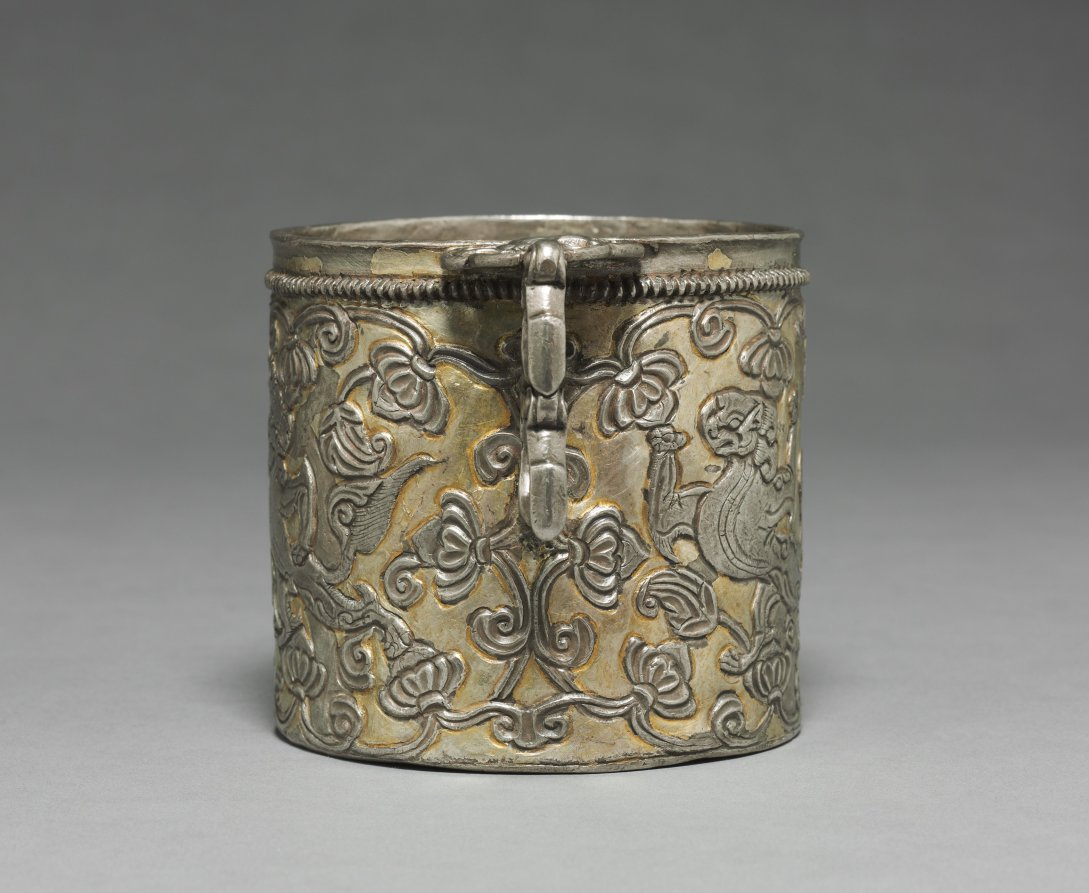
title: Beaker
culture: Central Asia (Sogdiana) or Tibet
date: c. late 600s–early 700s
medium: silver with gilding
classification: Silver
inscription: Inscribed on bottom of the cup: "Phan shing gong skyes gui sug byad (or byang)"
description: The circular shapes of the cup’s handle feature a flat edge on which the user rested their thumb for better grip, a design characteristic of silver objects made during the 700s by Sogdian artists, who traveled from Central Asia along international trade routes. An ownership inscription in Tibetan script on the underside of the cup identifies the vessel as a personal possession. The circles and lines carved below this inscription are likely measurements recording the weight of the silver used for the cup.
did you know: This cup depicts two lions and a lionlike animal with horns!